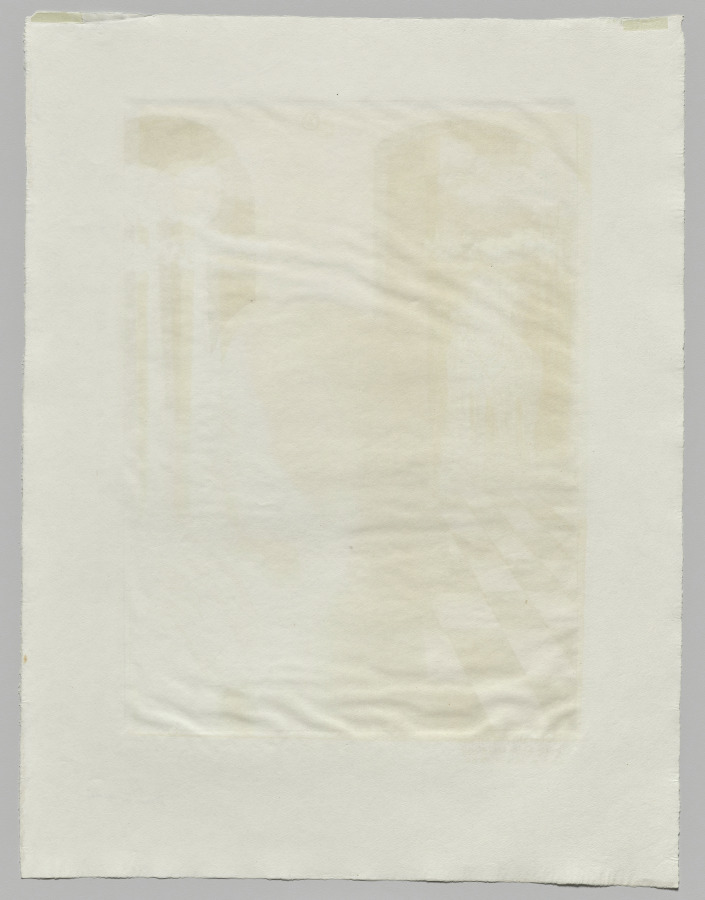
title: The Knight Did Not Die in the Crusade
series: Love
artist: Maurice Denis (French, 1870–1943)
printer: August Clot (French, 1858–1936)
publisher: Ambroise Vollard (French, 1867–1939)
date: 1899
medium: color lithograph on wove paper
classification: Print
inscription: Recto, lower left: “le chevalier n’est pas/mort a la croisade”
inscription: In graphite, recto, lower right: “89/Maurice Denis (signed)”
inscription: Stamp in image, recto, center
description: Maurice Denis belonged to the Nabis, a group of artists who came together in 1889 to pursue a radical new style informed by subjective experience and emotion. This print is from a series in which Denis explored his devotion to his wife, Marthe, by depicting her in a variety of settings alongside titles drawn from his own journal. The vague but evocative images were meant to encourage the viewer to draw connections to the theme and meditate on its meaning.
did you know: Maurice Denis was a devout Catholic and often drew visual connections between his wife, Marthe, the subject of this print series, and the Virgin Mary.